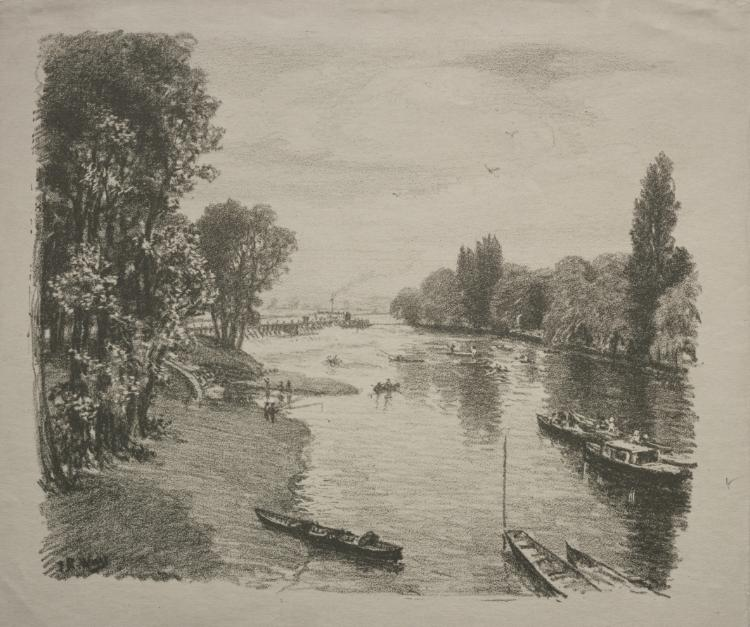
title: The Thames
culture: England, 19th century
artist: Thomas Robert Way (British, 1861–1913)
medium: lithograph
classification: Print